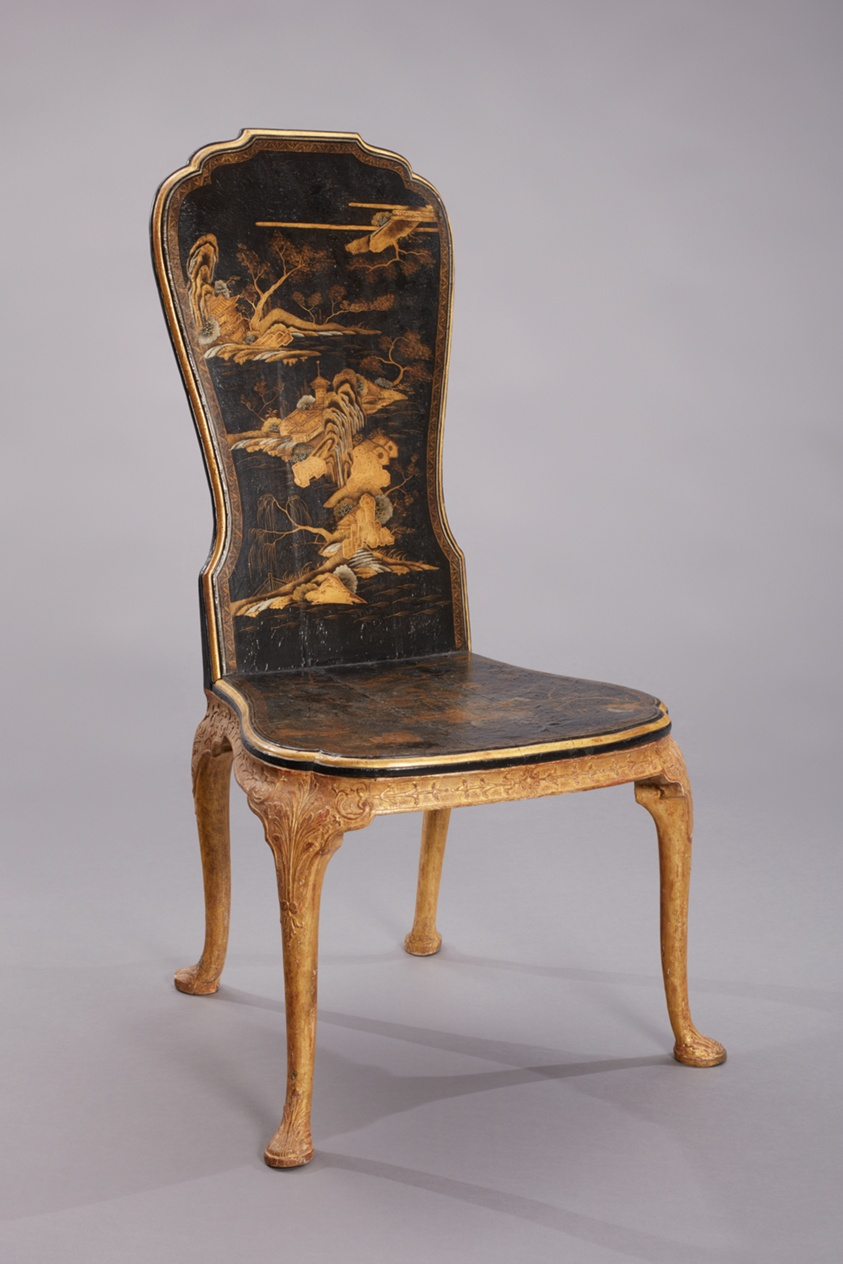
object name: Furniture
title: Pair of Hall Chairs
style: Baroque, chinoiserie, georgian, 18th Century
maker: China (lacquer back and seat panels) and England (frame)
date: 1720-30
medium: Frames: gilt gesso on beechwood; Backs and seats: lacquered and gilt Chinese softwood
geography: England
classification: chair; furniture; seating; european decorative arts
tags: landscapes, rocks